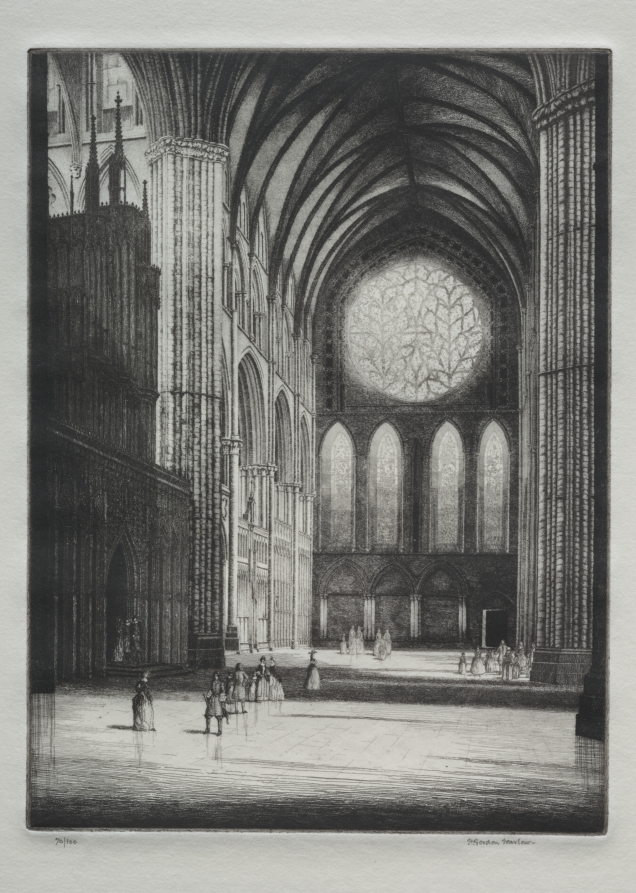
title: Lincoln Cathedral, Interior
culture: England, 20th century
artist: Herbert Gordon Warlow (British, 1885–1942)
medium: drypoint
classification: Print